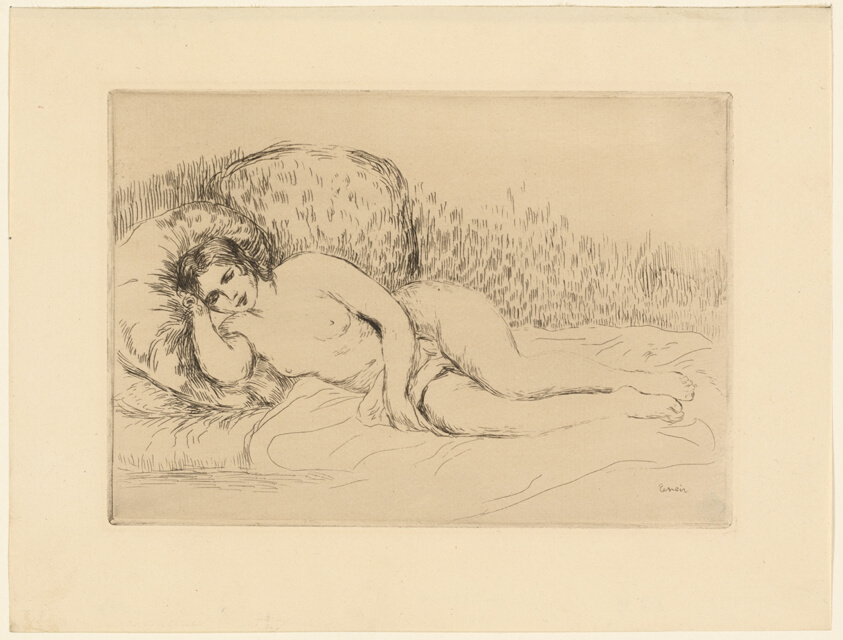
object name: Print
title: Woman Reclining, to the Left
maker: Pierre Auguste Renoir; French, 1841-1919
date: c. 1906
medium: Etching on cream wove paper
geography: France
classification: etching; print; prints and drawing